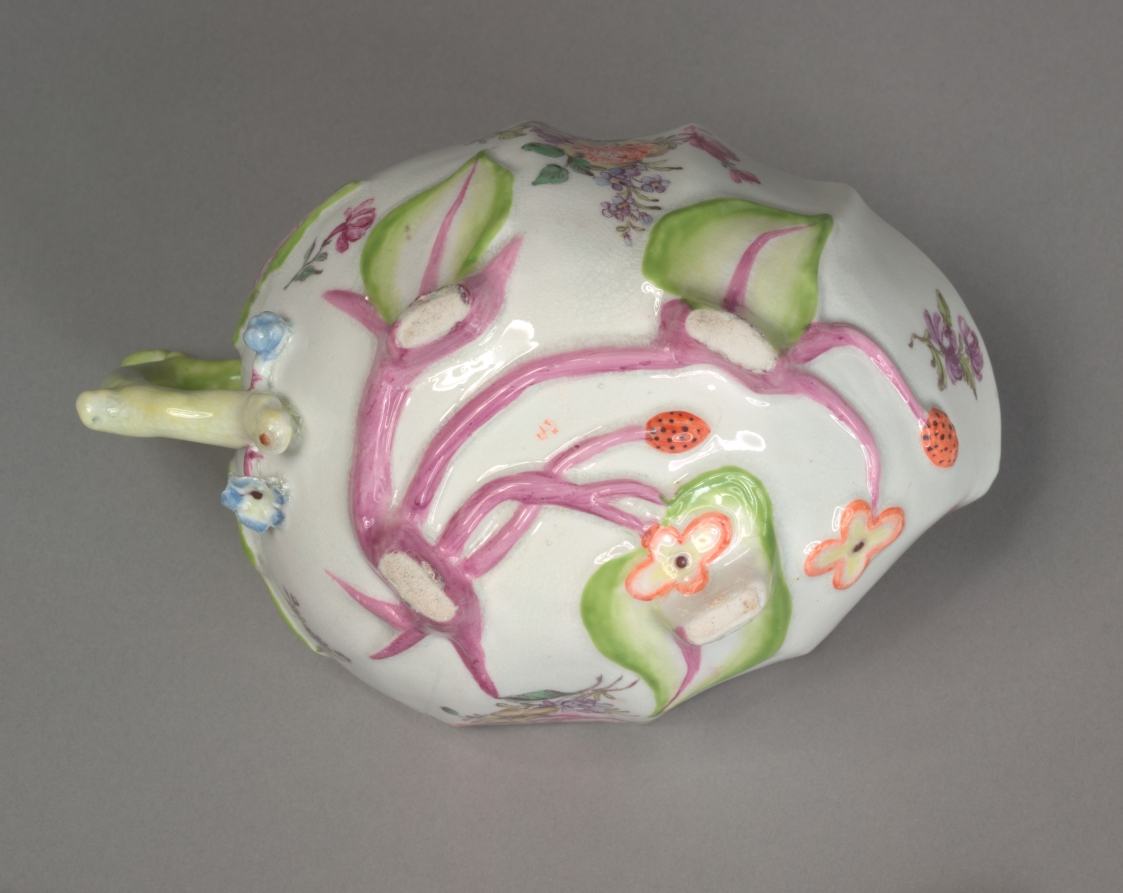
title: Sauceboat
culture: England, Chelsea, 18th century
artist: Chelsea Porcelain Factory (Britain, London, 1745–84)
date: c. 1755–1756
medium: porcelain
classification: Ceramic